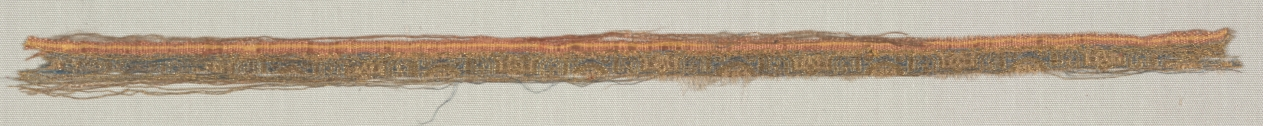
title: Silk Fragment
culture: Spain, Islamic period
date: c. 1279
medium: plain compound cloth; silk and gold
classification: Textile